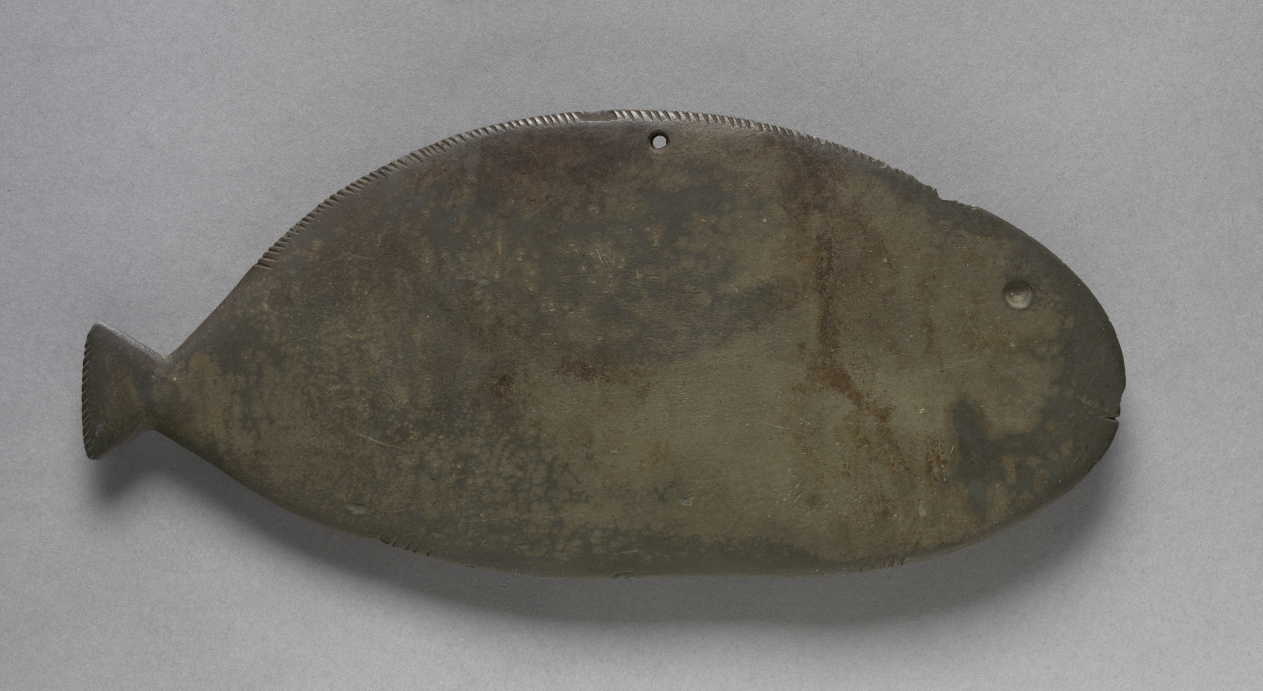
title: Palette in the Form of a Fish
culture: Egypt, Predynastic (5000–2950 BCE), Naqada II–III (3650–3000 BCE)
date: c. 3500–2950 BCE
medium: graywacke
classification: Implements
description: Stone palettes were used for grinding eye paint worn for cosmetic purposes and to protect against sun glare and eye infections. There were two types: green, made from malachite (copper ore), and black, made from galena (lead ore). As funerary items, these ores may have had a deep significance for the deceased as symbols of regeneration and rebirth: the rich soil of the banks of the Nile (black), and the lush vegetation it sustained (green).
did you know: This fish shape is one of the most common for Egyptian cosmetic palettes.